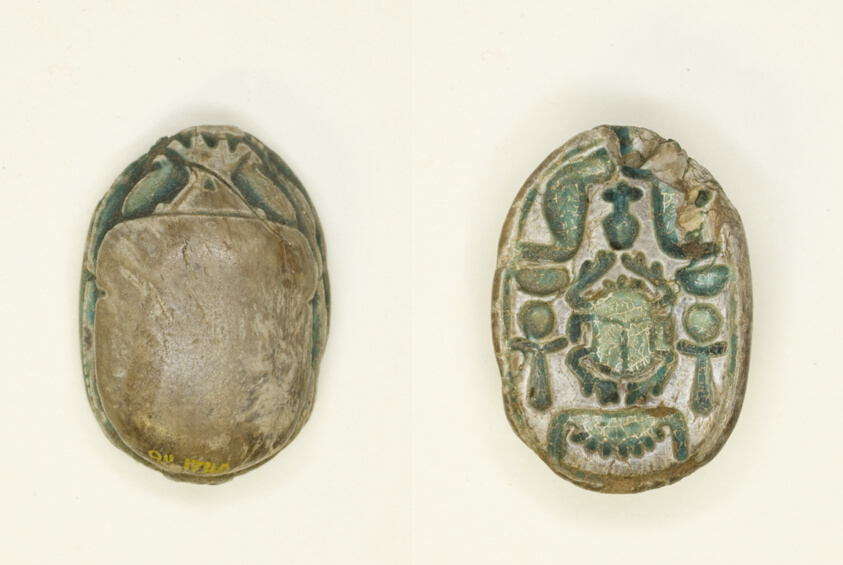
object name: Costume and Accessories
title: Scarab: Scarab Beetle with Hieroglyphs (cobras, anx-signs, nbw-sign)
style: middle kingdom, twelfth dynasty, ancient, egyptian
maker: Egyptian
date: Middle Kingdom, Dynasty 12 (about 1950–1773 BCE)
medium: Glazed steatite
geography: Egypt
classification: scarab; amulet; ancient art; costume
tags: scarab beetle, Hieroglyphs